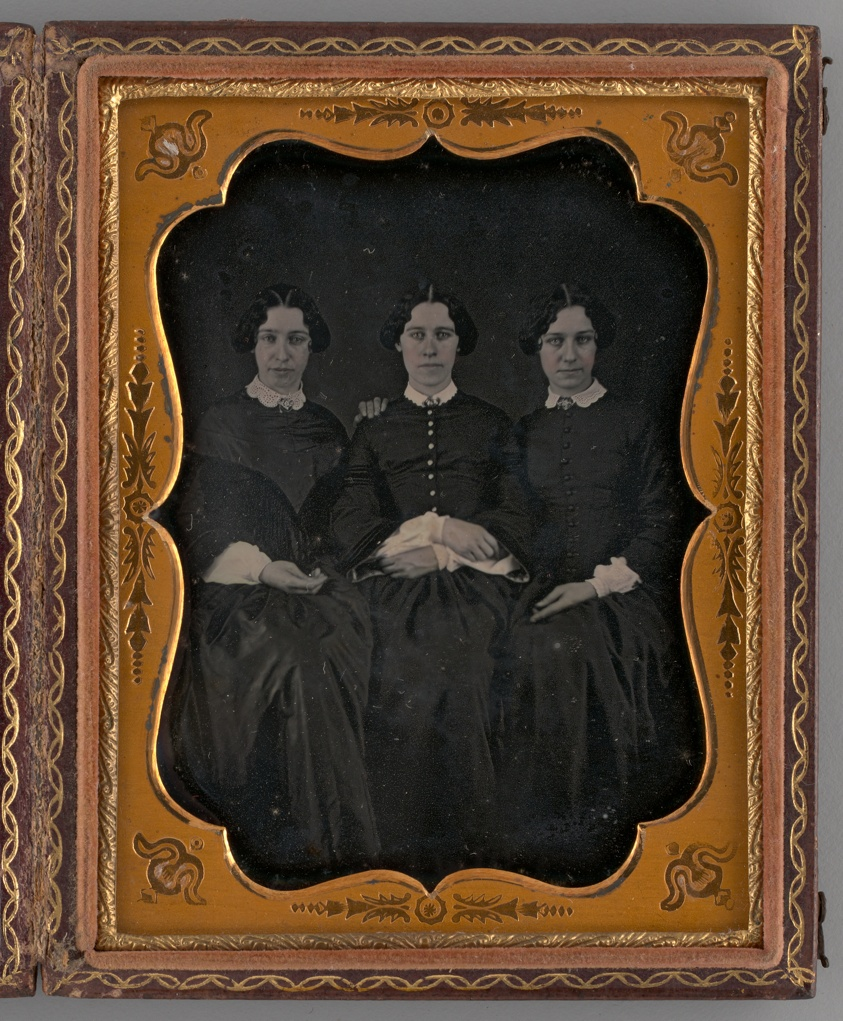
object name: Photograph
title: Untitled (Portrait of Three Women)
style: 19th century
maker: Albert George Park (American, 19th century)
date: 1855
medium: Daguerreotype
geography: United States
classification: portrait; photograph; photographic process; photography; portrait; daguerreotype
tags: lundberg collection, portrait, girls, females, portraits, portraits: child subject, portraits: female subject